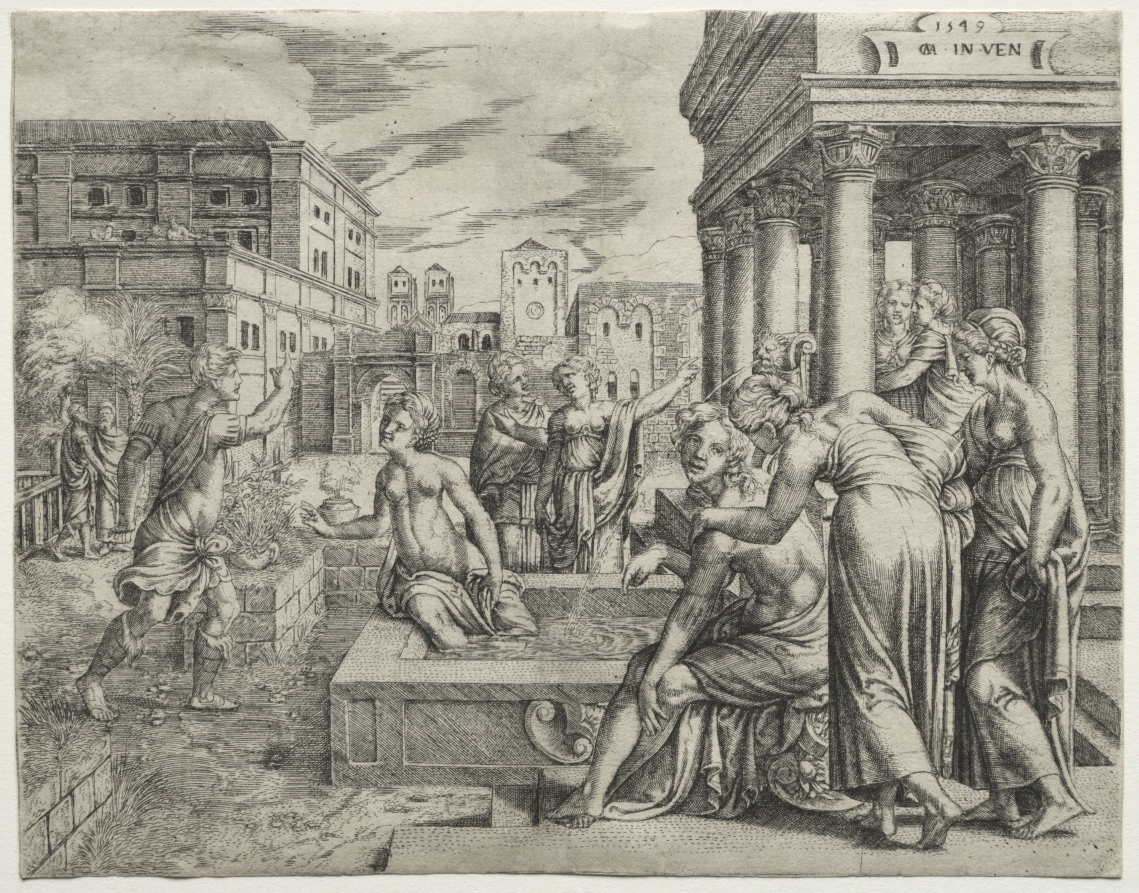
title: Bathsheba in the Bath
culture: Flanders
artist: Cornelis Massys (Flemish, 1510/11–1556/57)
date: 1549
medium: engraving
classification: Print